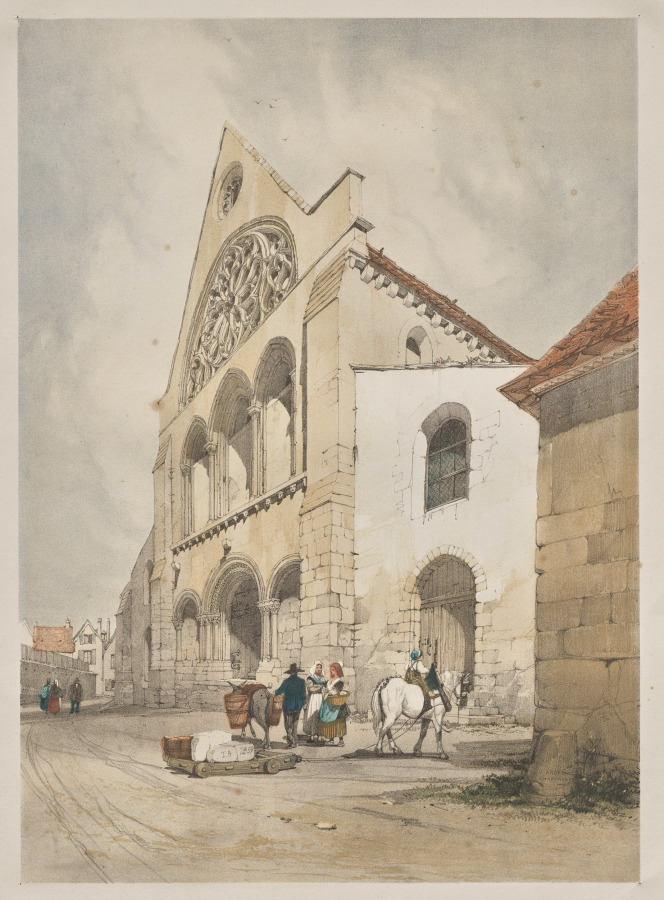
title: Picturesque Architecture in Paris, Ghent, Antwerp, Rouen: St. Andre, Chartres, France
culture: England, 19th century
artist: Thomas Shotter Boys (British, 1803–1874)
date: 1839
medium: lithograph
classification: Portfolio